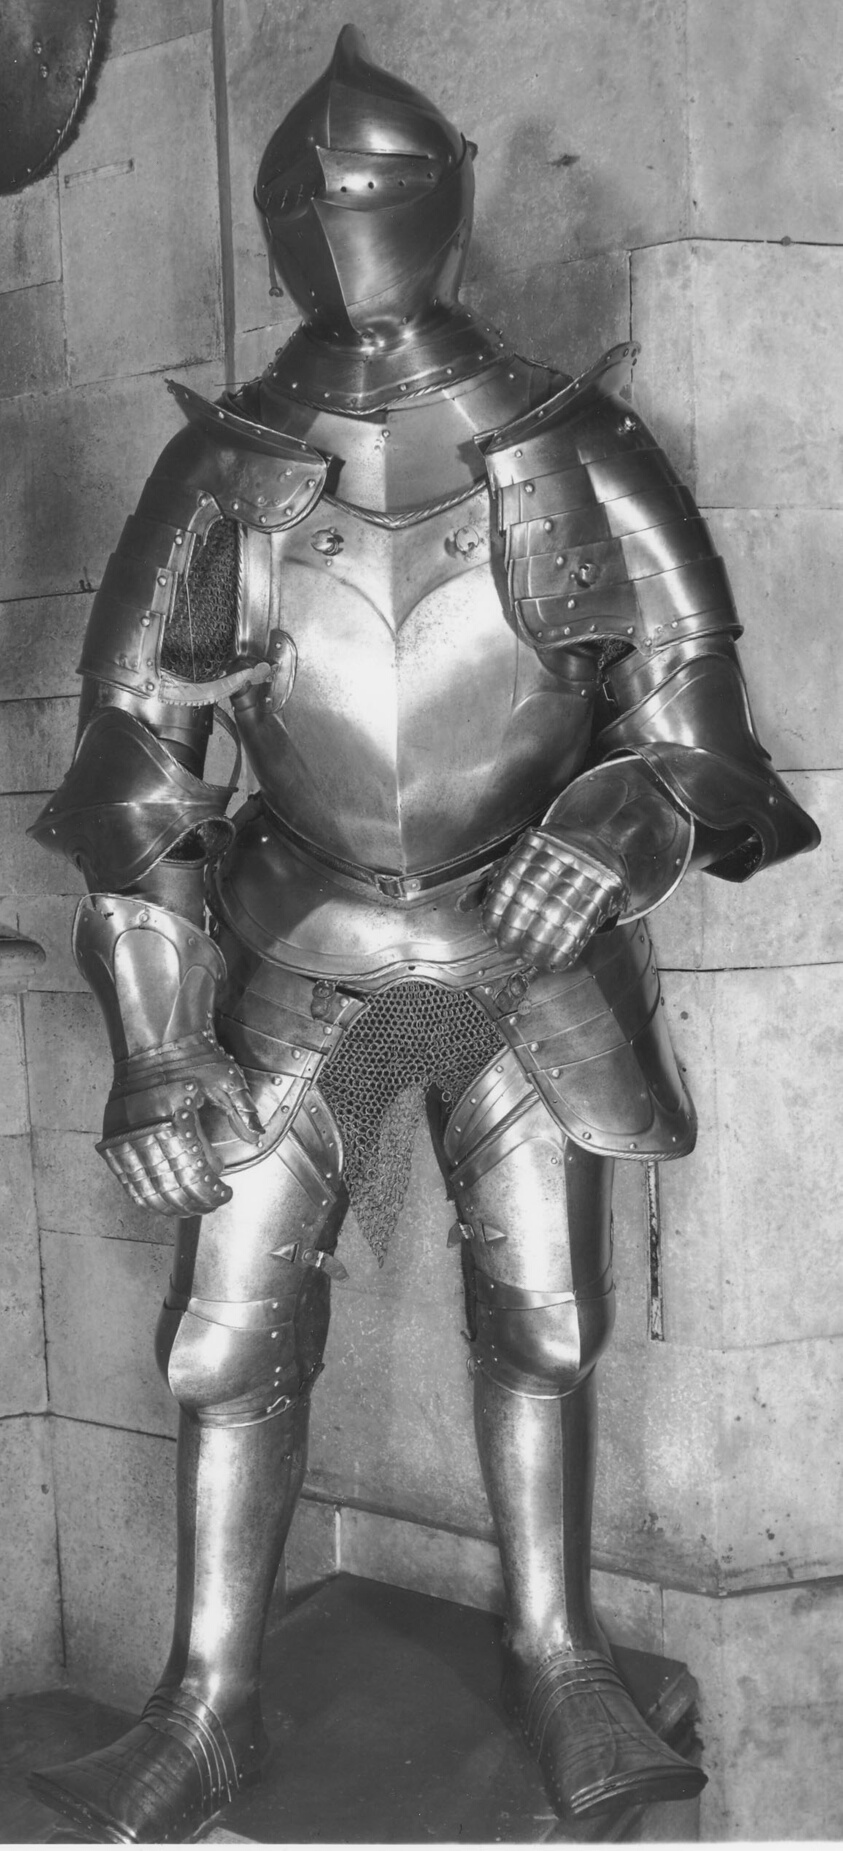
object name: Armor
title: Armor for the Field and Tourney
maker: Southern German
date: c. 1550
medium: Steel and leather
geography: Germany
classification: suit; armor; arms and armor